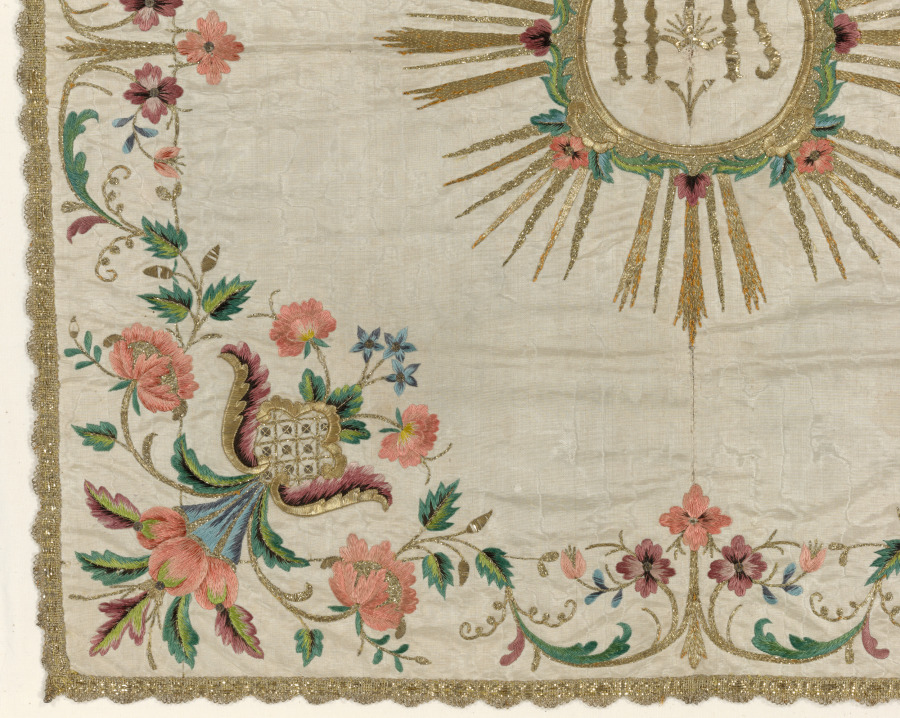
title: Chalice Veil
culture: Italy, 18th century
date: 1700s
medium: embroidery, silk and gold thread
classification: Embroidery